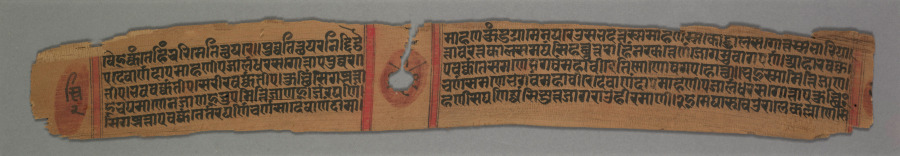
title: Folio 2 (verso), from a Kalpa-sutra and Story of Kalakacharya of Devachandra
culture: Western India, Gujarat, Patan (Anahillapura), reign of King Sarangadeva of the Vaghela dynasty (1275-1297)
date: 1279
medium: Gum tempera and ink on palm leaf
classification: Painting